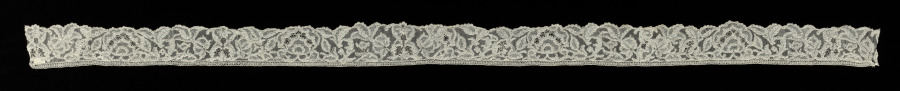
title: Lace Edging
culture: France, Alençon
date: 1700s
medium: Linen: needle lace (Point d'Alençon)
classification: Lace